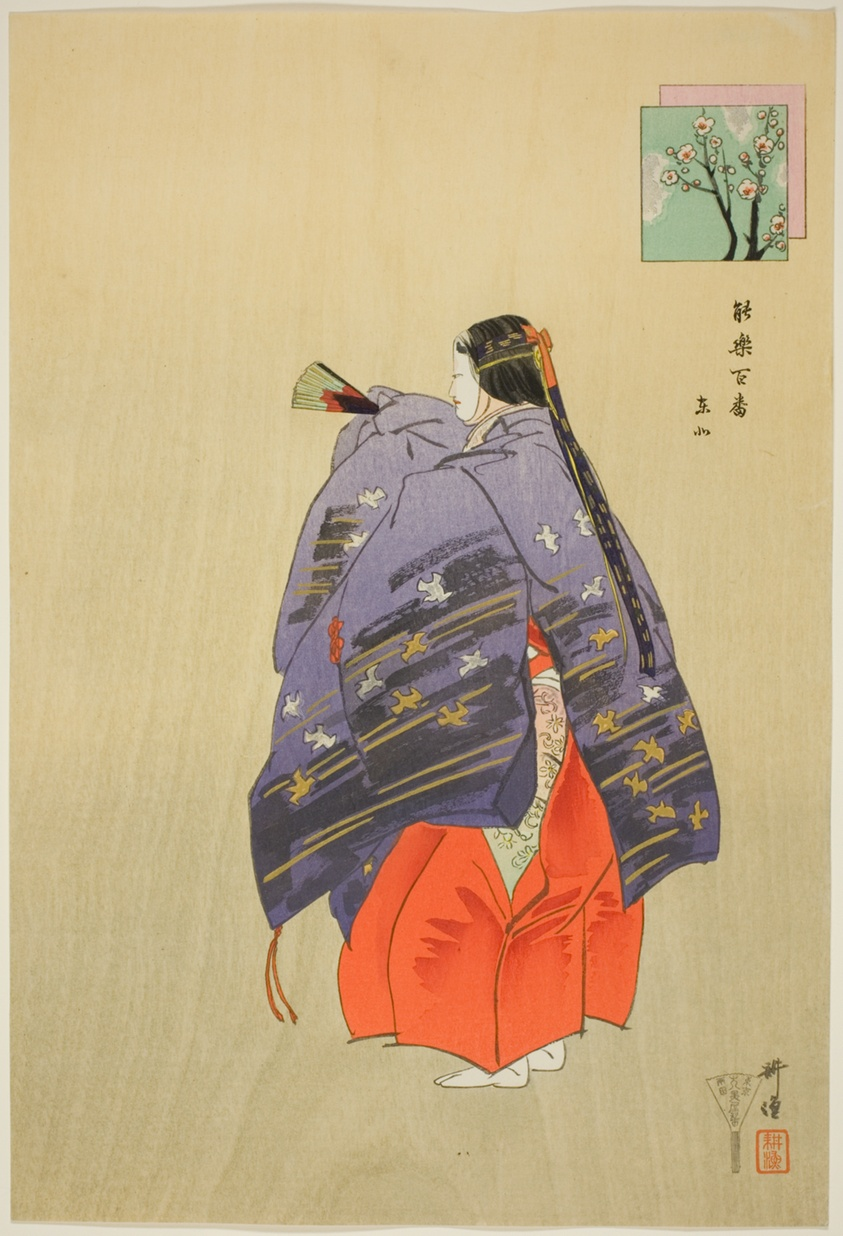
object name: Print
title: Toboku, from the series "One Hundred No Dramas (Nogaku hyakuban)"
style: Japanese (culture or style)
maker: Tsukioka Kogyo; Japanese, 1869-1927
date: 1898/1903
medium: Color woodblock print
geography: Japan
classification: woodblock print; print; asian art